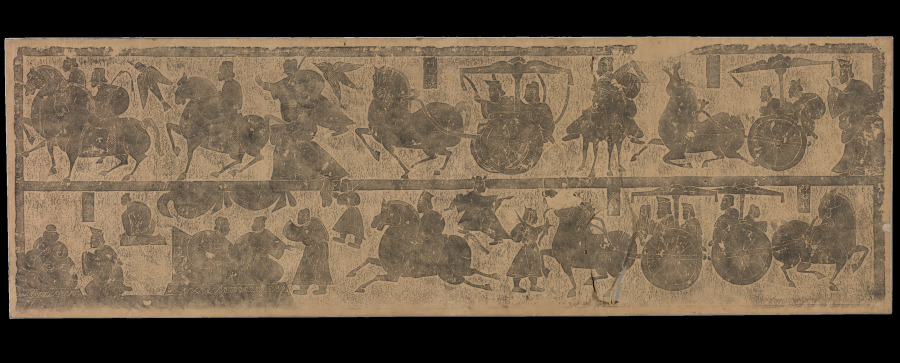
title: Rubbing of a Stone from the Tang-Fang Collection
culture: China, Qing dynasty (1644-1911) or Republican period (1912-49)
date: 1900–1919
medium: ink on paper, rubbing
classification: Miscellaneous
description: The procession of figures, riders, and chariots correspond in part to a section from the east wall in stone chamber 2 of the Wu Liang shrine.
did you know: To make a rubbing, a moistened sheet of paper is laid over an image and tamped with an ink pad that then colors the raised areas, while leaving concave sections and incised lines white.